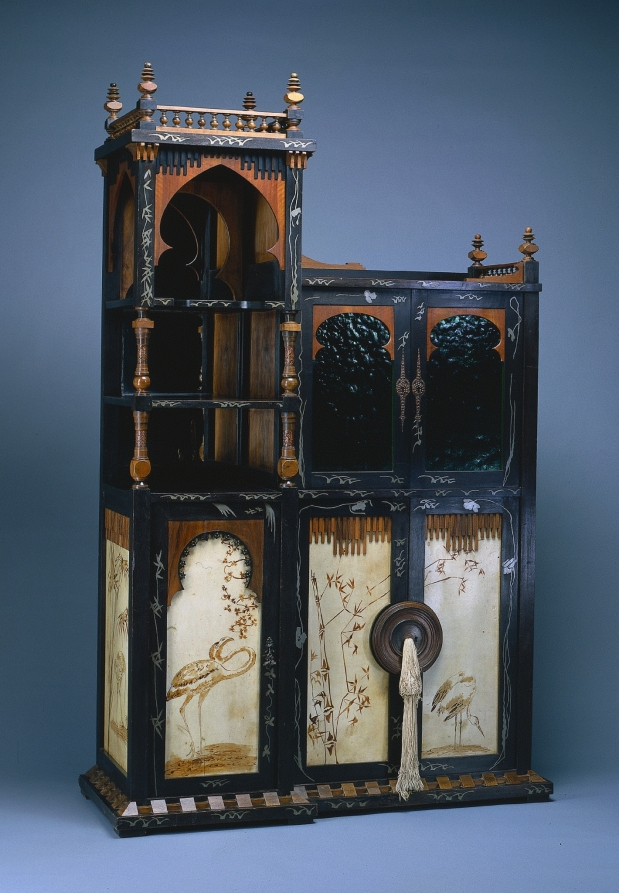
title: Cabinet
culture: France, late 19th Century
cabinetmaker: Carlo Bugatti (Italian, 1856–1940)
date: c. 1895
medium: wood with metal inlays and painted parchment, glass doors and mirror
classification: Furniture and woodwork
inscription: vellum panel on right side at the bottom signed in pseudo Japanese letters: "Casati. (No professional artist of this name has been discovered; may be the work of the society woman, the Marchese Casati.)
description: In both form and decoration this cabinet typifies the work of Carlo Bugatti. Asymmetrical, with a tower-like element at one side, there are Islamic-inspired ornaments throughout its design, notably the onion-shaped arches in the upper half of the cabinet. Japanese influence is also evident in the white metal inlays and in the sepia-painted parchment panels. The cabinet displays an extensive vocabulary of other decorative devices, including the partial ebonized frame, the turned wooden ornaments, metal reliefs, mirrored and green glass, and silk tassels. Despite their diversity, Bugatti organized all these elements into a coherent design.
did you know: Carlo Bugatti's sons achieved illustrious careers of their own. Rembrandt Bugatti (1884-1916) became a celebrated sculptor, and Ettore Bugatti (1881-1947) manufactured luxurious automobiles and racing cars.